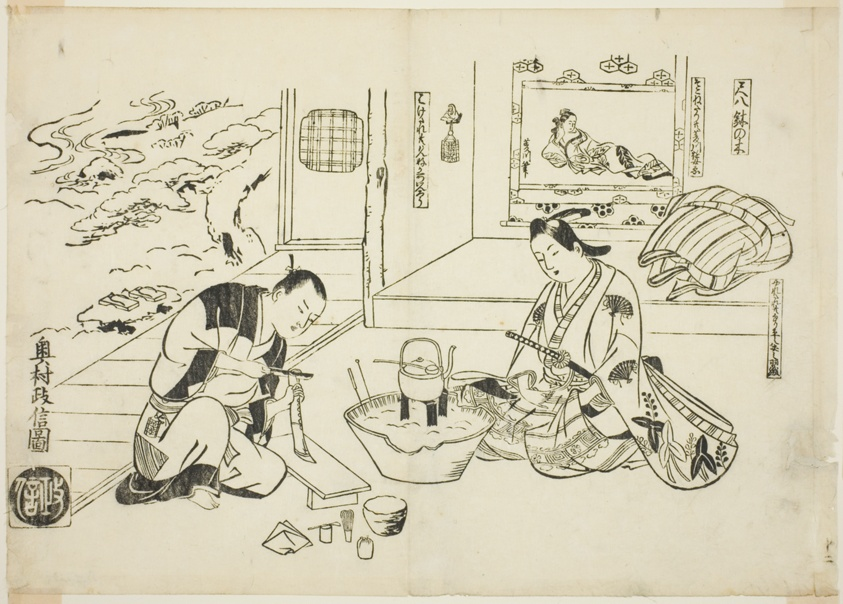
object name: Print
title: The Bamboo Flute and the Potted Tree (Shakuhachi hachi-no-ki), no. 12 from a series of 12 prints depicting parodies of plays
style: Japanese (culture or style)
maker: Okumura Masanobu (Japanese, 1686-1764)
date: c. 1716/35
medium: Woodblock print; oban, sumizuri-e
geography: Japan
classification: woodblock print; print; asian art; woodblock